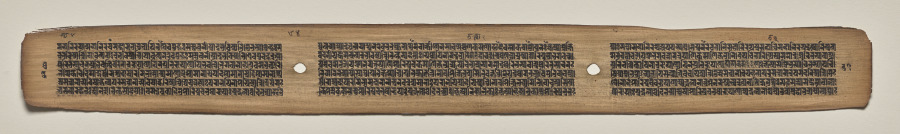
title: Text, Folio 64 (verso), from a Manuscript of the Perfection of Wisdom in Eight Thousand Lines (Ashtasahasrika Prajnaparamita-sutra)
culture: Eastern India, Bihar, Vikramashila Monastery. Painting: Nepal, Kathmandu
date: Sunday, September 14, 1119 (year 239 of the Newar Samvat in the month of Ashvina)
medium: gum tempera and ink on palm leaves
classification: Painting